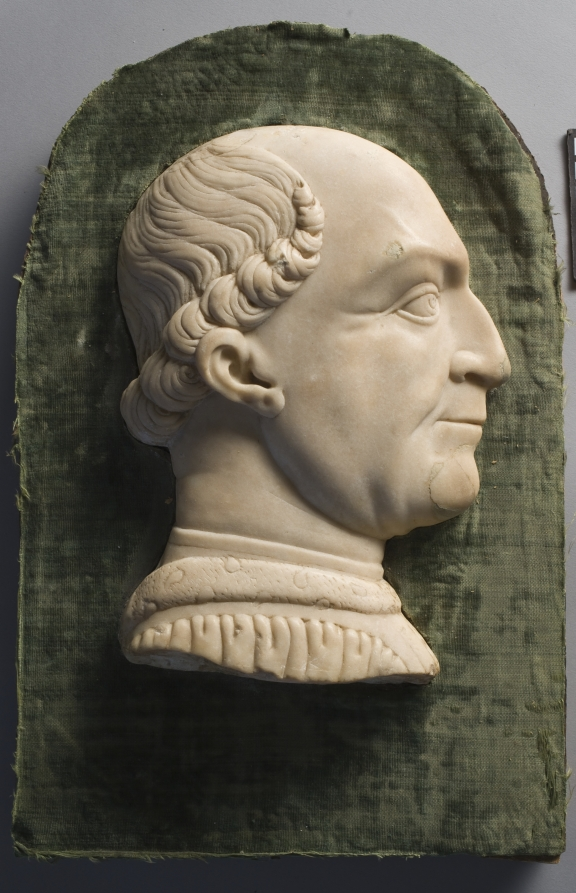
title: Portrait of Francesco Sforza (frame)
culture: Italy, Lombardy, 15th century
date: 1450–1499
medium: wood with gesso, polychromed and gilded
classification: Sculpture